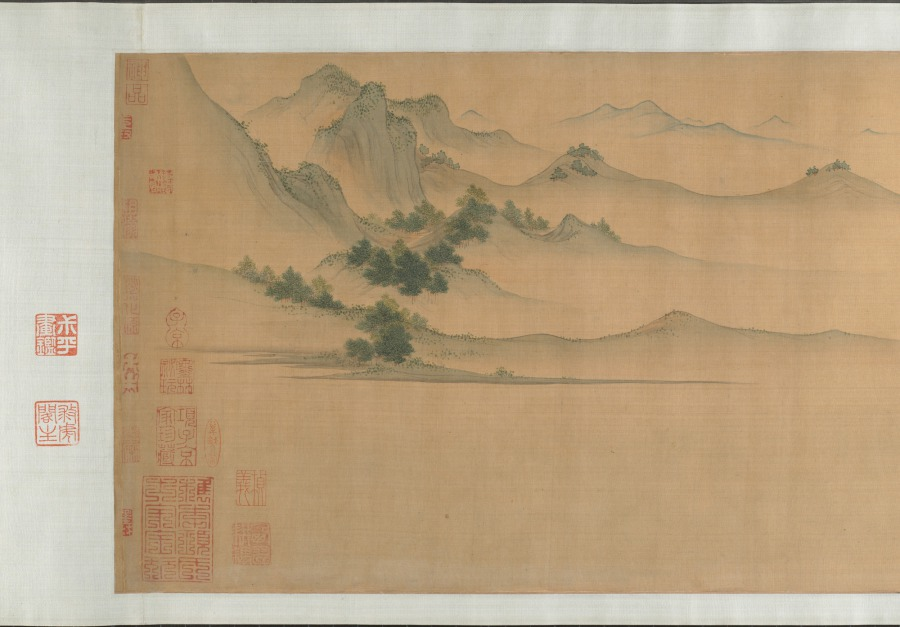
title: Garden for Solitary Enjoyment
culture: China, Ming dynasty (1368–1644)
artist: Qiu Ying (Chinese, 1494–1552)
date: 1515–52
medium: Handscroll; ink and light color on silk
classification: Painting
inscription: Accompanying text of an essay together with seven poems of Sima Guang (1019–1086) and one poem of Su Shi (1037–1101) written by Wen Zhengming (1470–1559) in 1558.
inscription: 2 colophons and 82 seals: 4 seals of Wen Zhengming 文徵明 (1470–1559); 59 seals of Xiang Yuanbian 項元汴 (1525–1590); 1 colophon, dated 1644, and 7 seals of Xiang Yukui 項禹揆 (c. late 1500s–1659); 1 colophon, dated 1880, and 2 seals of Weng Tonghe 翁同龢 (1830–1904); 2 seals of Ch'eng Chen-i (19th c.); 1 seal of Han Ch'ung (19th c.); 4 seals of Wan-go H. C. Weng 翁萬戈 (1918–2020); 3 seals unidentified.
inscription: Colophon by Xiang Yukui 項禹揆 (c. late 1500s–1659): The painting of The Garden for Self-enjoyment on the right by Shih-chou, Mr. Qiu [Qiu Ying] is in the style of Li Lung-mien. Its mood is peaceful, as if meeting the ancient gentlemen face to face among the brushes and silk; it lifts one above the sordid bustle of life. Formerly, my late father handed me this scroll which had only the painting without the written essay. I considered asking a good calligrapher to write the essay to add to it but was afraid that the quality of the writing would not match the painting. Several years later, I saw at a friend's house this essay and poems (of Ssu-ma Kuang] written by Hengshan [Wen Zhengming], once owned by my grandfather; so I spared no expense to obtain it. I rejoiced at this and said: "The divine swords are finally united. How things are pre-destined!" Now my friend Chang Kung-chao's technique for mounting [painting and calligraphy] is excellent. Therefore by daring to take them out and join them together, I can preserve this beautiful story of singular reunion. Xiang Yukui recorded at Hai-yeh-t'ang [hall] two days before New Year's Eve in the jiasheng year of the Chongzhen era [1644]. trans. LYSL/HK/WKH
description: Garden of Solitary Enjoyment refers to a site built in 1073 by the statesman Sima Guang (1019–1086) after he had retired to Luoyang, Henan province. Every spring, visitors would flock to his garden. Each of its seven structures references a historic figure. Sima wrote: I channel streams [like Du Mu], to water flowers [like Bai Juyi], or trim bamboo [like Wang Huizhi]. . . . I know of no joy between heaven and earth that could take its place. Qiu Ying’s painting, created after an 11th-century version of the same theme, must have appealed to garden owners of the Ming dynasty, since it became the template for numerous Suzhou workshop copies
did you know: Sima Guang completed his monumental survey of Chinese history, Zizhi tongjian, in the garden depicted in this painting.